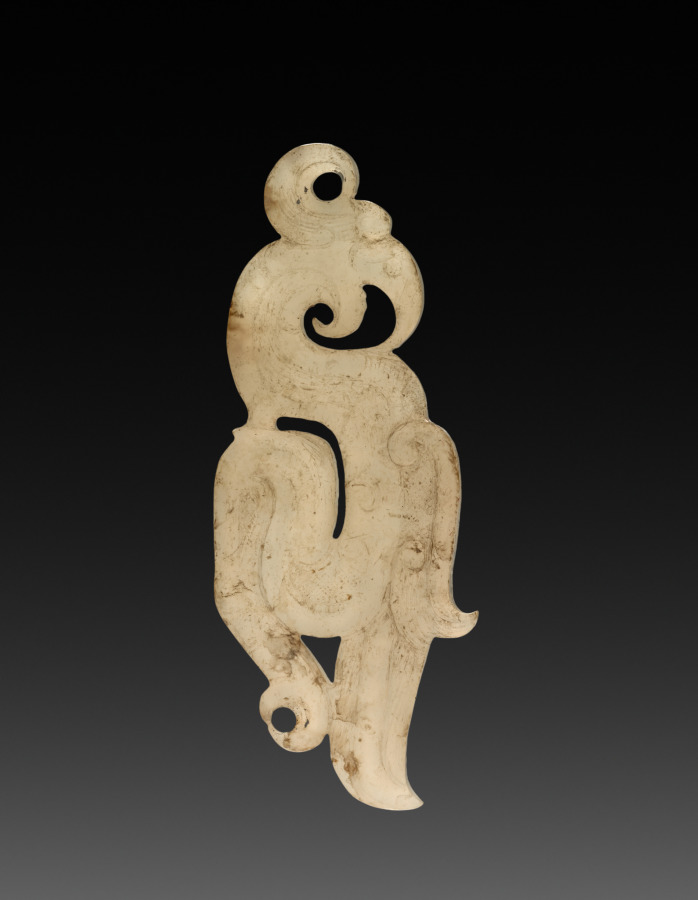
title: Curvilinear Bird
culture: China, Eastern Zhou dynasty (770–256 BCE), Warring States period (475–221 BCE)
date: 475–221 BCE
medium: nephrite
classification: Jade